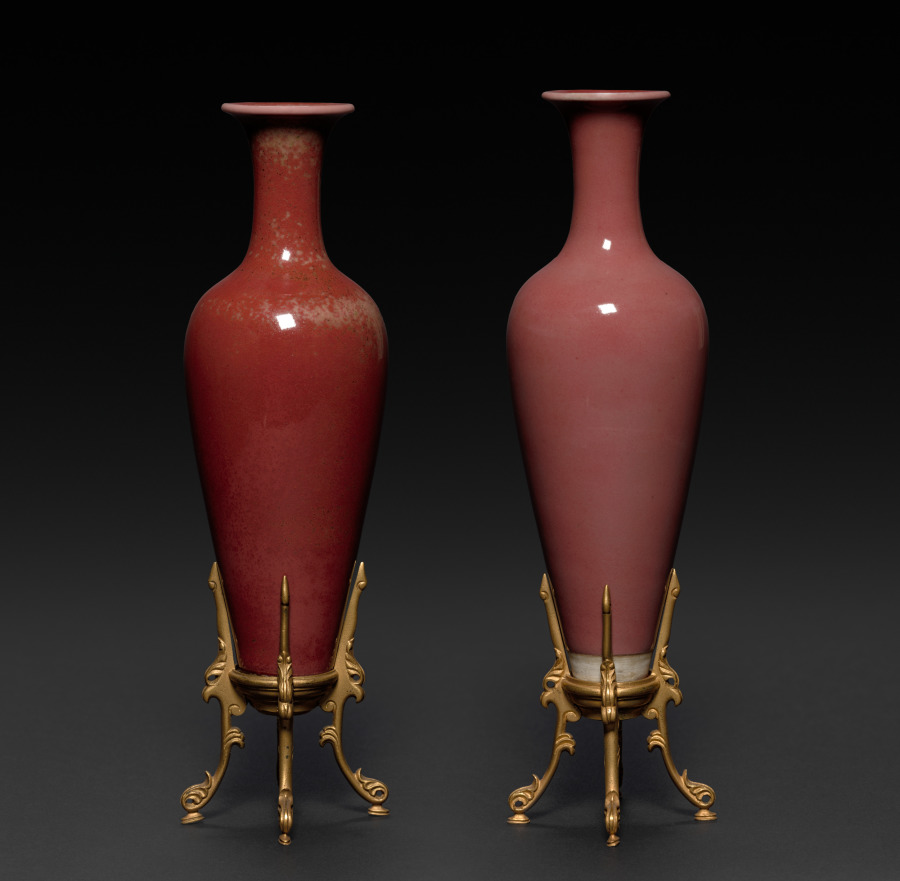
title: Pair of Bottles with Peach Bloom Glaze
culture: China, Qing dynasty (1644-1911), Kangxi reign (1661-1722)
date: 1662–1722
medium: porcelain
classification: Ceramic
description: The "peach-bloom" glaze developed during the Kangxi era has also been described as "drunken with beauty." Technical achievements were transcended with aesthetic associations, revealing the greatest sensitivity to all things beautiful in nature.